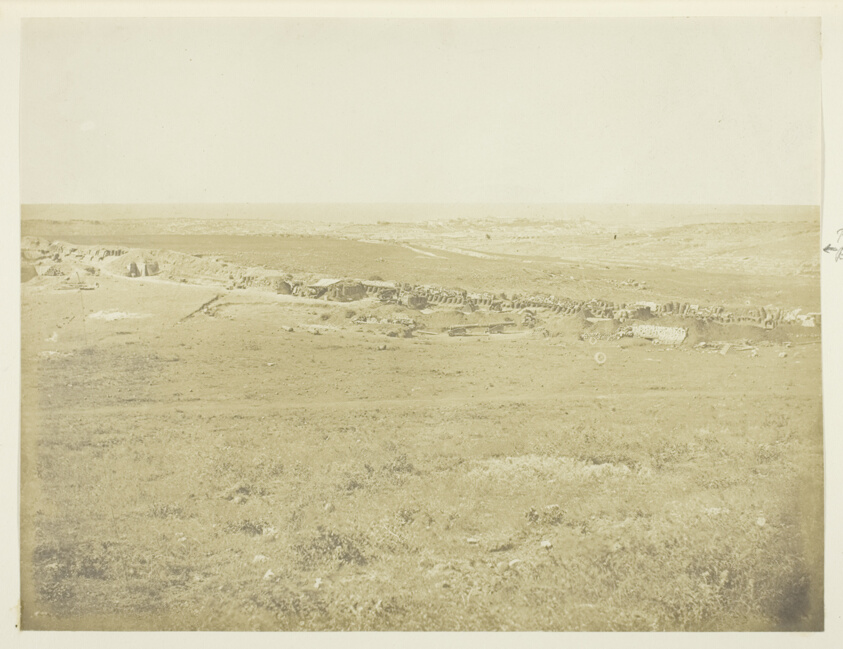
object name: Photograph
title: English Left Attack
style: 19th century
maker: James Robertson (Scottish, c. 1813–d. after 1881)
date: 1855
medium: Albumen print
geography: Scotland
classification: unidentified; photography; photograph